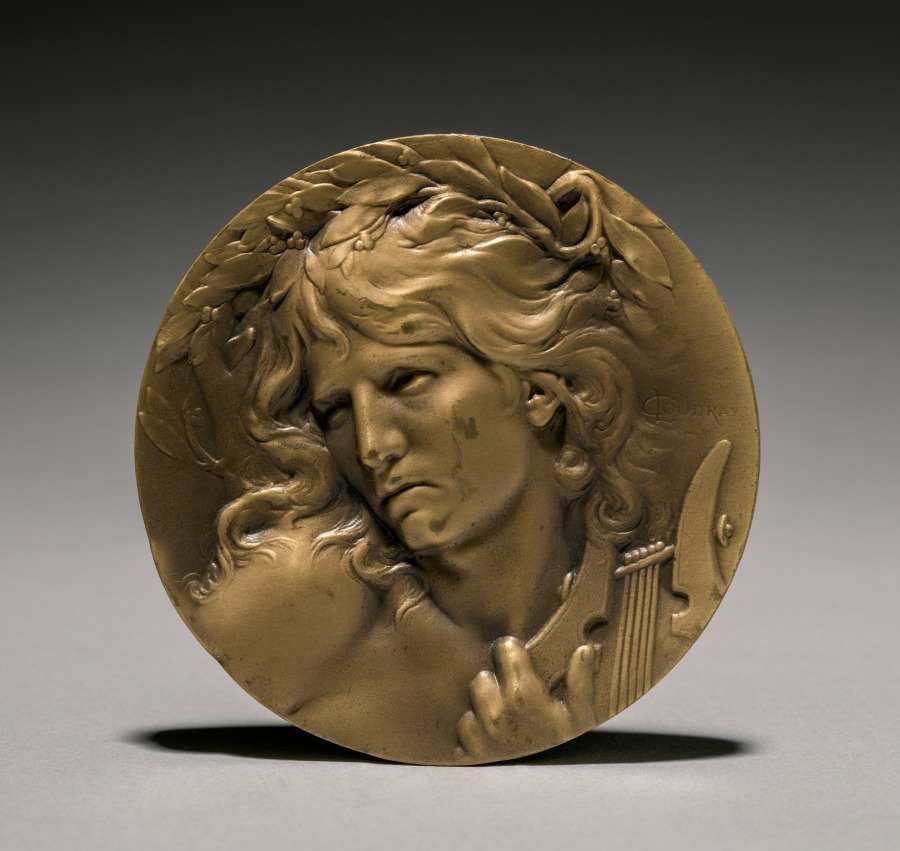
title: Medal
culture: France, 20th century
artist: Marie Alexandre Lucien Coudray (French, 1864–1932)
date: 1900s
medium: bronze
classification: Metalwork